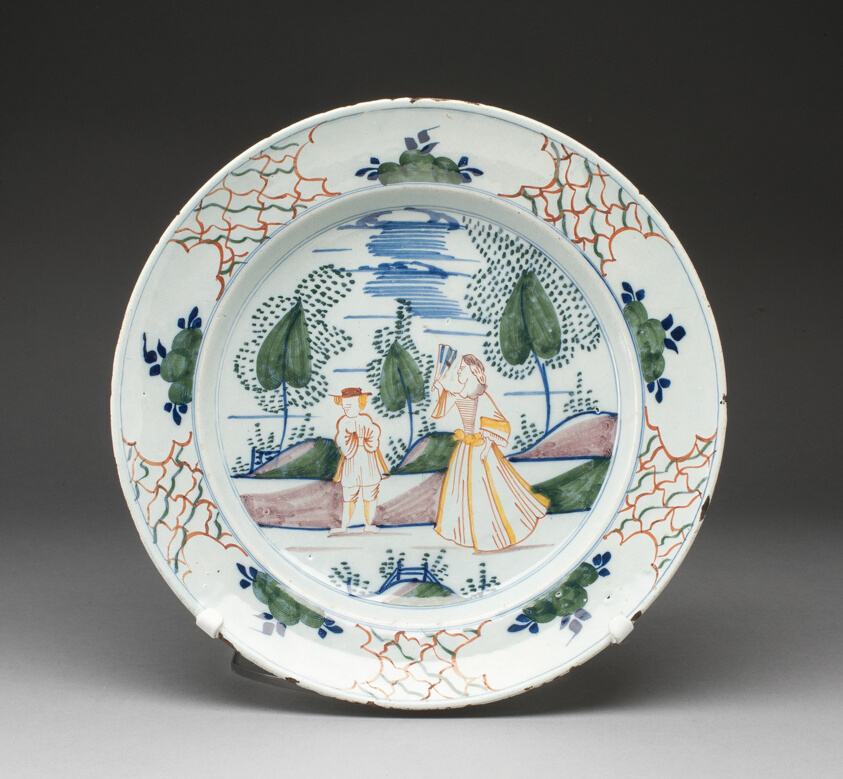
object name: Ceramics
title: Plate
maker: Delft, Netherlands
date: 17th century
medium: Tin-glazed earthenware (Delftware)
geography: Delft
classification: plate (general, dish); earthenware; dish (vessel); european decorative arts; ceramics